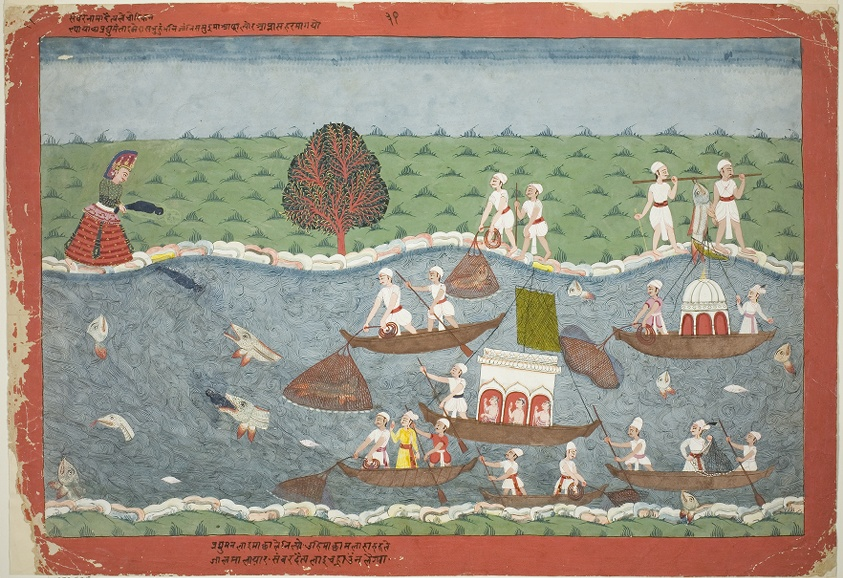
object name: Painting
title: The Demon Sambar Throws the Infant Pradyumna into the River, page from a Dispersed Bhagavata Purana manuscript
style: Himalayan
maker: Nepal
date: c. 1775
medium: Opaque watercolor on paper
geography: Nepal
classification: miniature painting; painting; asian art